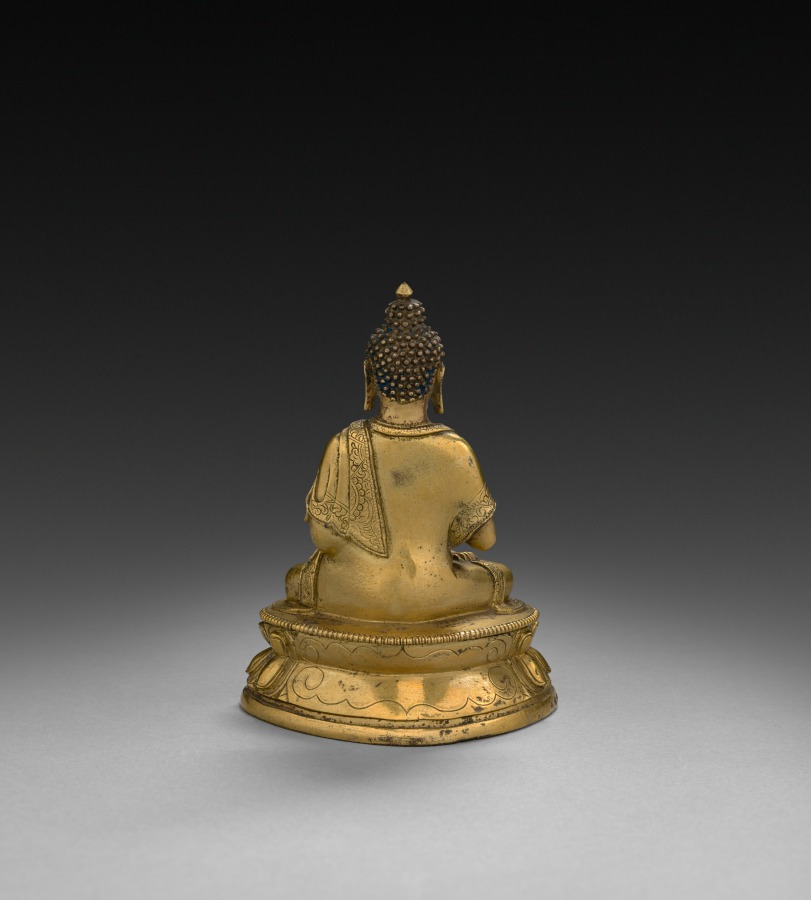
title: Seated Buddha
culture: China, Ming dynasty (1368–1644)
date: 1500s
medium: gilt bronze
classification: Sculpture